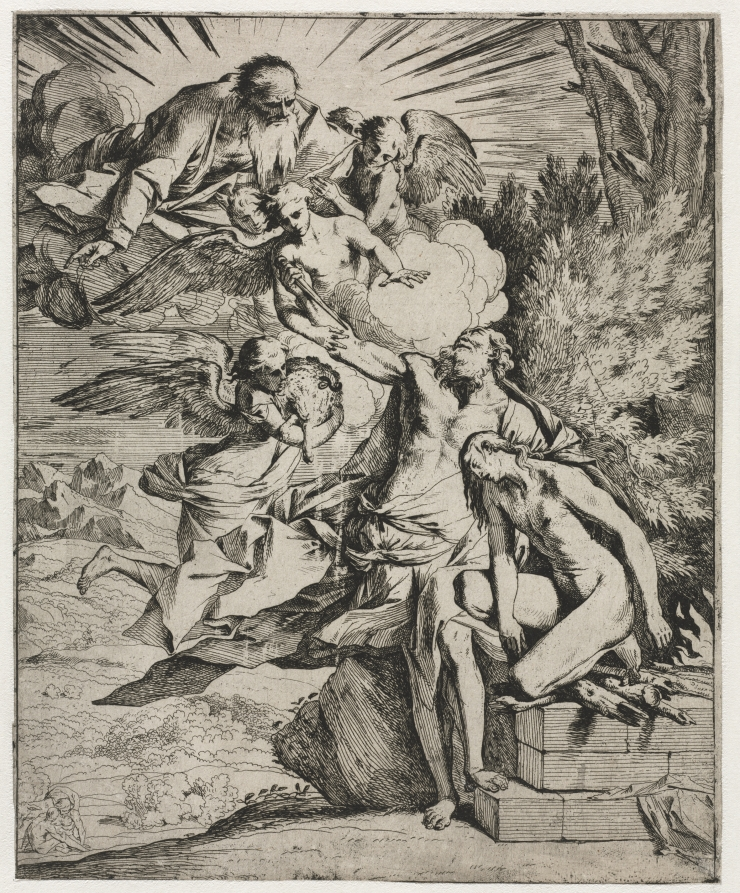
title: The Sacrifice of Abraham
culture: Italy, 17th century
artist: Pietro Testa (Italian, 1612–1650)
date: ca. 1645–50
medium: etching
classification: Print